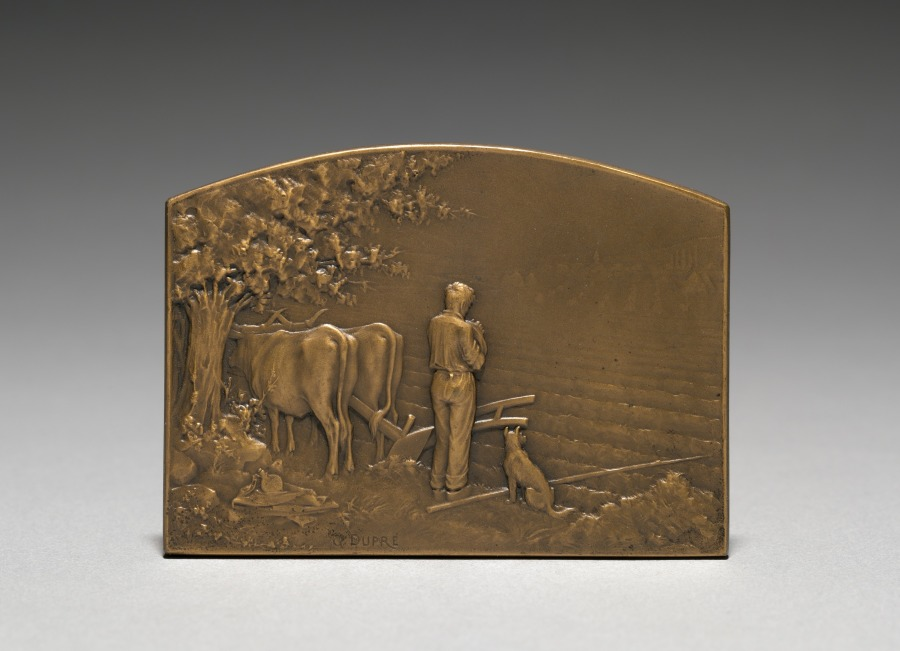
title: Medallion (obverse)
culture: France, 19th-20th century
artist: Jules Dupré (French, 1811–1889)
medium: bronze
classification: Metalwork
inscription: signed: "G. Dupré."